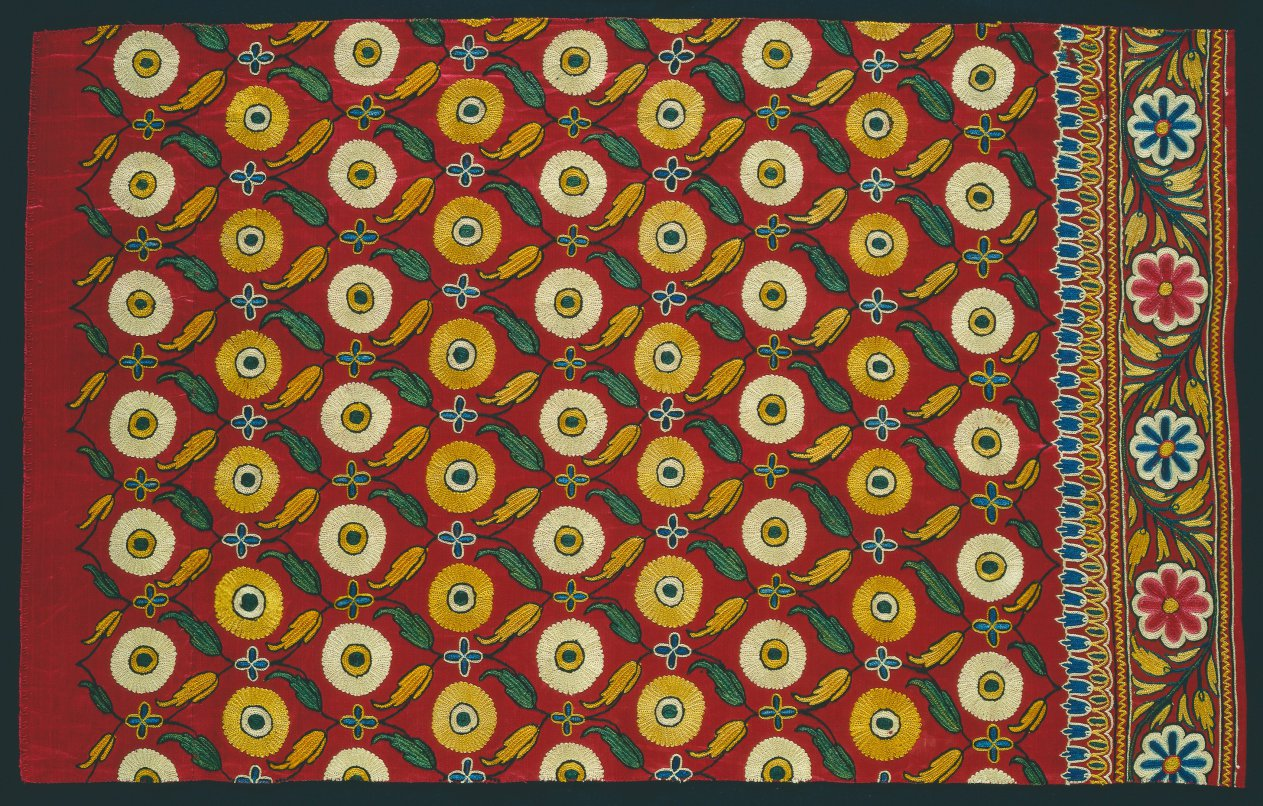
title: Part of a Skirt (Ghagra)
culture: Western India, Gujarat, Kachchh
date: 1800s–early 1900s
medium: silk thread on silk ground, embroidery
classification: Embroidery